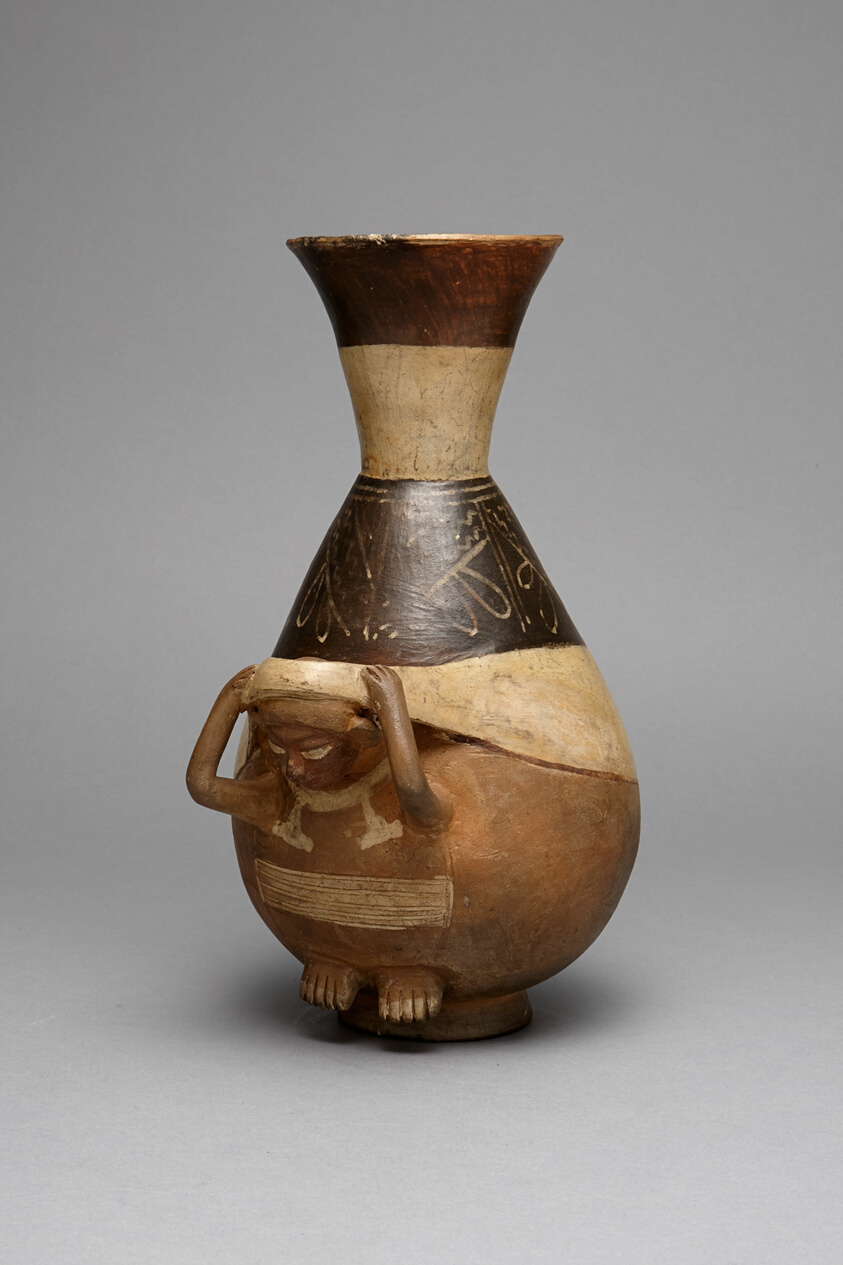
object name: Vessel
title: Bottle in Form of a Figure Carrying a Burden with a Tumpline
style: moche, mochica v, mochica, early intermediate period, Pre-Columbian, americas, Arts of the Americas, andean, andes, south american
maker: Moche (North coast, Peru)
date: 100 BCE–500 CE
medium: Ceramic and pigment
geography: Moche Valley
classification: earthenware; ceramics; vessel; art of the americas